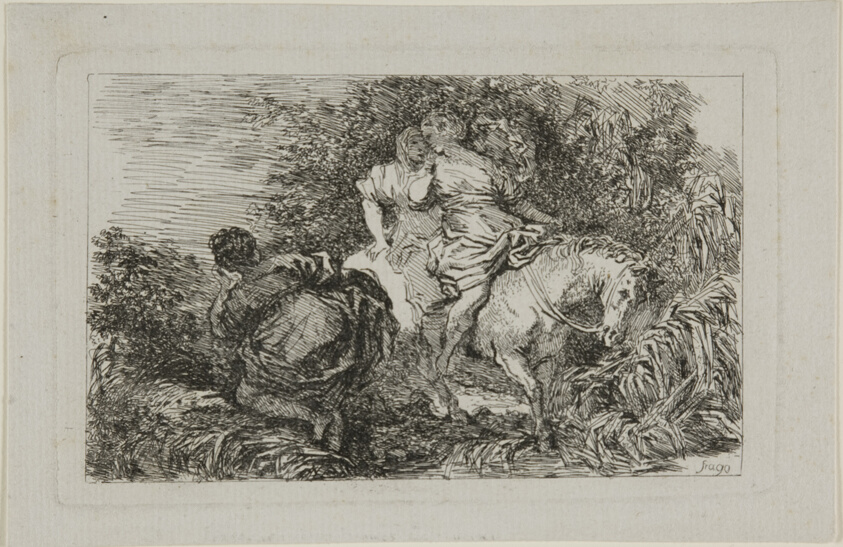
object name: Print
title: Cloelia and Her Companions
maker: Jean-Honore Fragonard (French, 1732-1806); after Livio Mehus (Flemish, c. 1630-1691)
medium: Etching on ivory laid paper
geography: France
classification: prints and drawing; etching; print